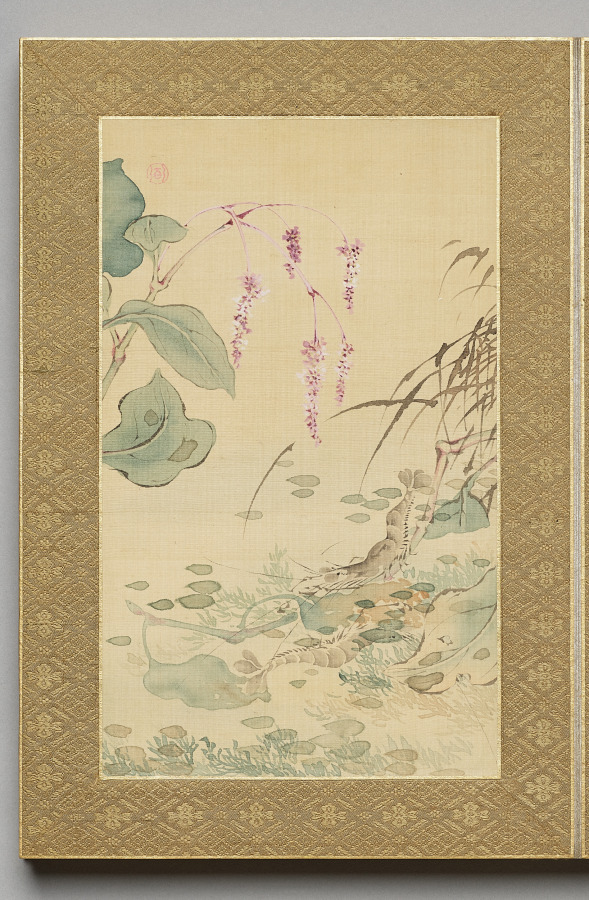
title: Painting from Flowers and Grasses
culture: Japan, Edo period (1615–1868)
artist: Tsubaki Chinzan (Japanese, 1801–1854)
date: 1841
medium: album; ink and color on silk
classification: Painting